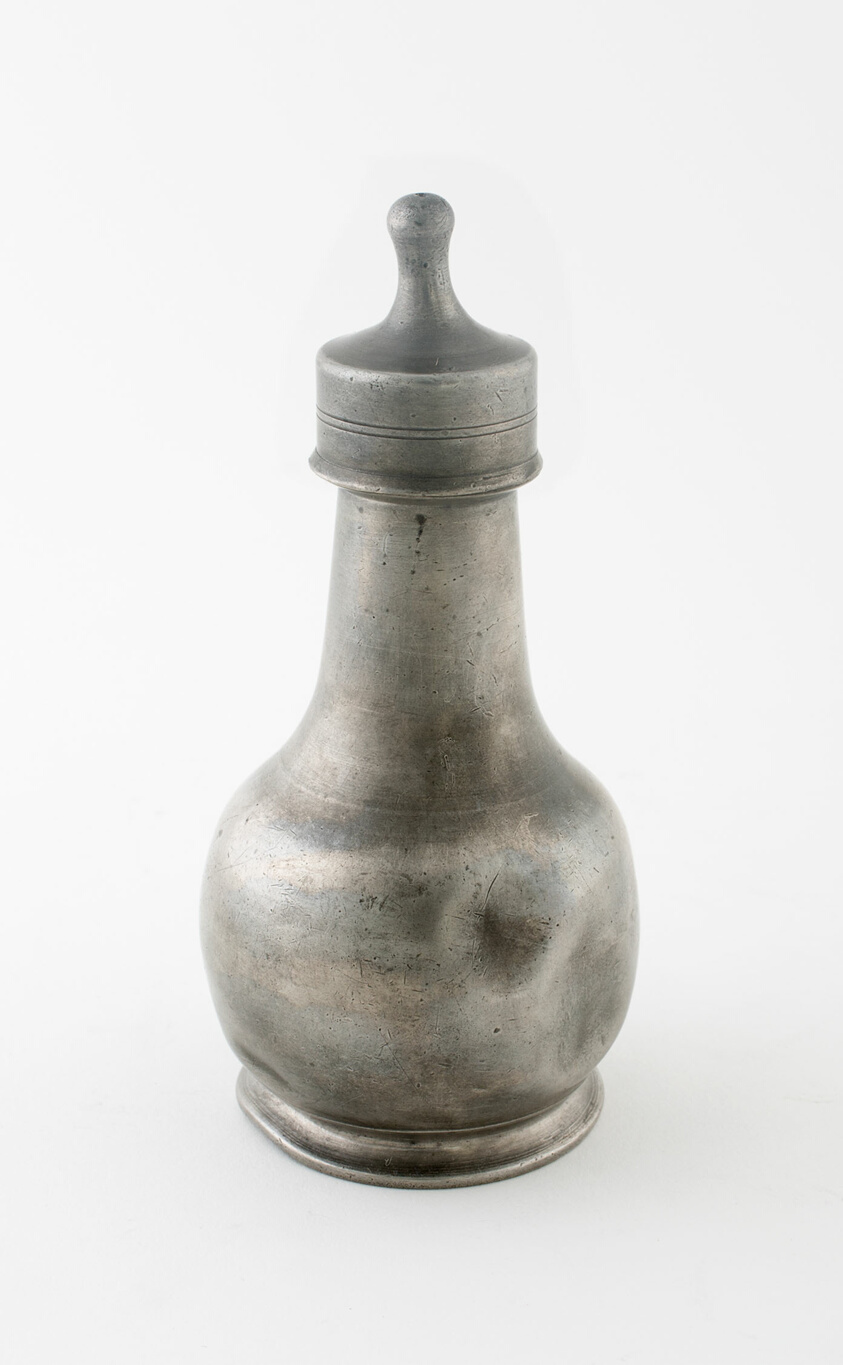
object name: Metalwork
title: Nursing Bottle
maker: Probably England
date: c. 1800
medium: Pewter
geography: England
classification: pewter; metalwork; european decorative arts